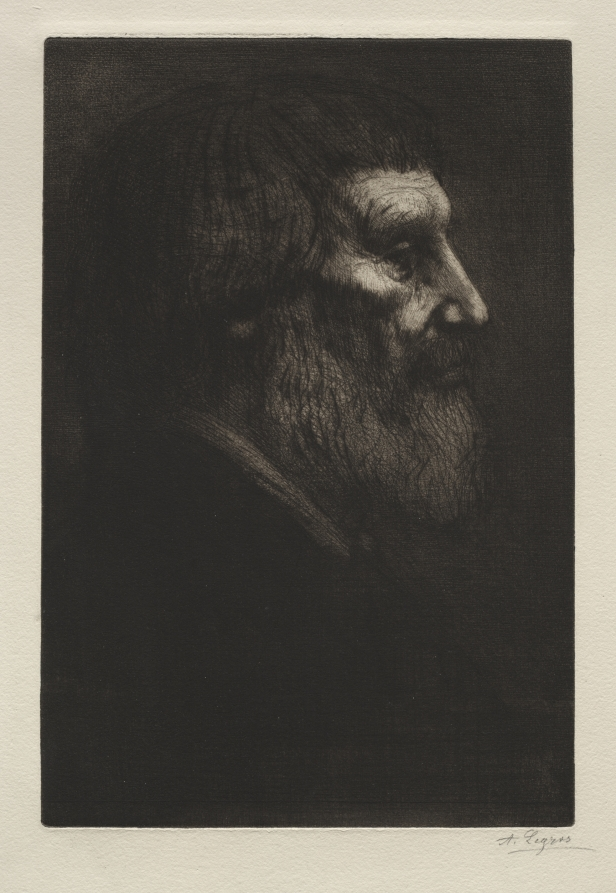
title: Head of a Man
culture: France, 19th century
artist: Alphonse Legros (French, 1837–1911)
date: c. 1857–1911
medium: etching, drypoint and aquatint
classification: Print